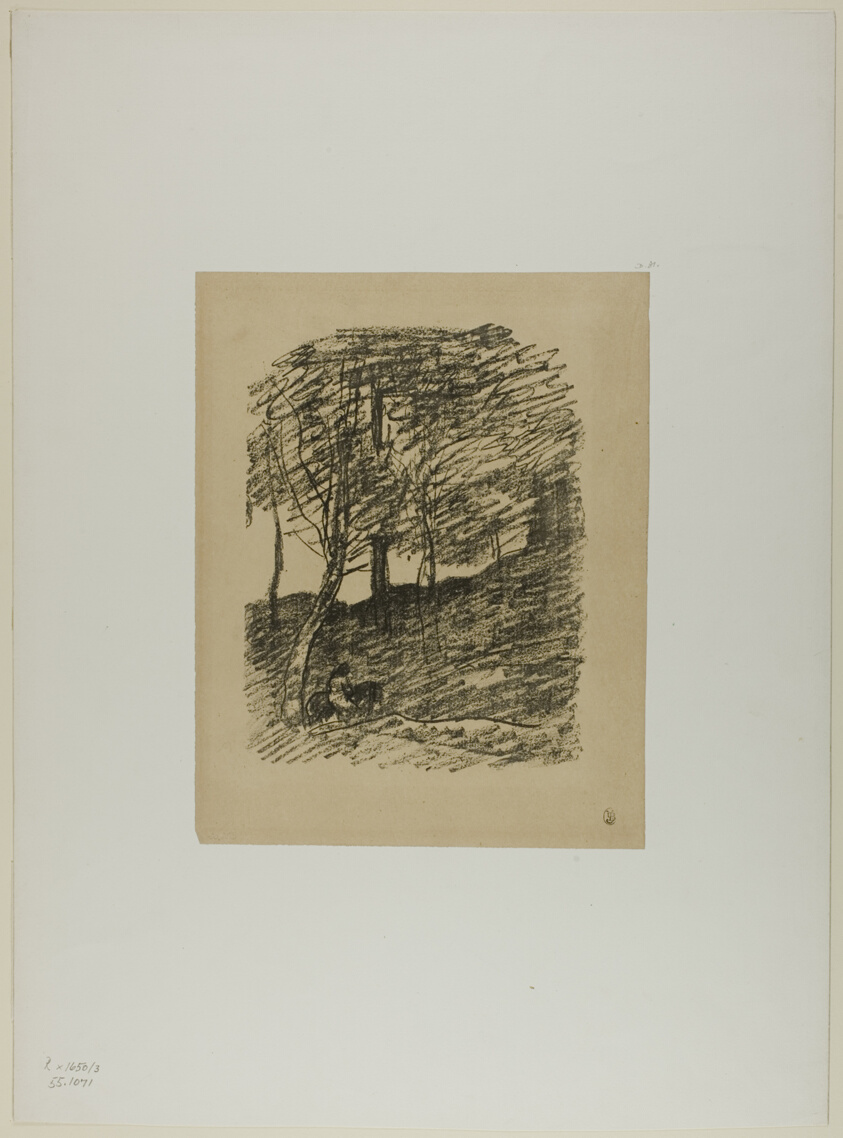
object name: Print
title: Beneath the Trees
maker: Jean-Baptiste-Camille Corot; French, 1796-1875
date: 1871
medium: Transfer lithograph printed in black on tan China paper laid down on white wove paper, retouched by hand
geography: France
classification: lithograph; print; prints and drawing